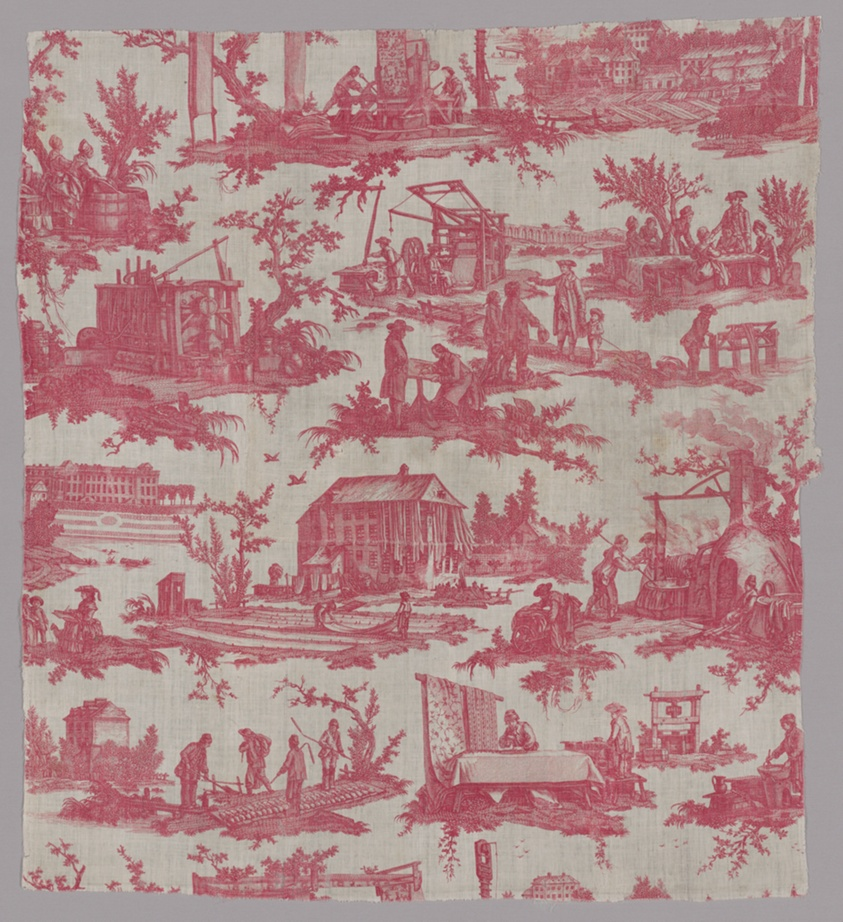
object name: Textile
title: Les Travaux de la Manufacture (The Activities of the Factory) (Furnishing Fabric)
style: jouy-en-Josas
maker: Designed by Jean Baptiste Huet (French, 1745–1811); Manufactured by Christophe-Philippe Oberkampf (naturalized French, 1738-1815), Oberkampf Manufactory (French, 1760-1843); Jouy-en-Josas, France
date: 1783/84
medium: Cotton, plain weave; copper-plate printed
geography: Jouy-en-Josas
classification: textile; weaving - printed; printed textile; furnishing textile